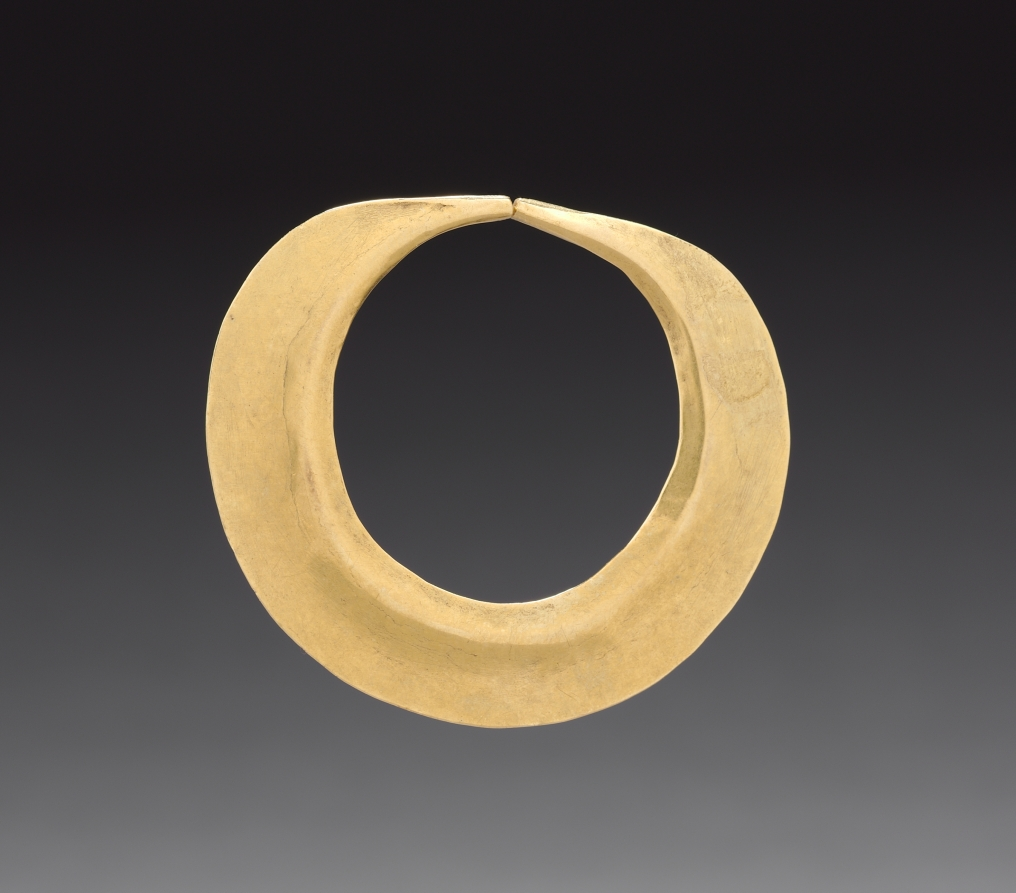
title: Nose Ornament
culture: West-central Colombia, Quimbaya style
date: c. 400–1000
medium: hammered gold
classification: Jewelry